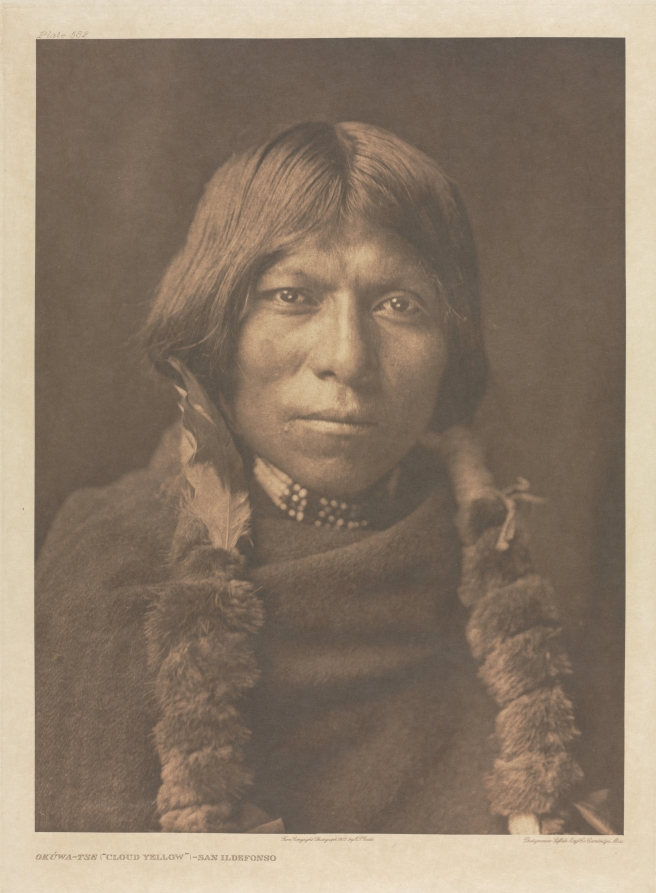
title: Portfolio XVII, Plate 582: Okúwa-tse ("Cloud Yellow") - San Ildefonso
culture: America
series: The North American Indian: being a series of Portfolios picturing and describing the Indians of the United States, the Dominion of Canada, and Alaska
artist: Edward S. Curtis (American, 1868–1952)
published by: The University Press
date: 1905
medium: photogravure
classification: Portfolio